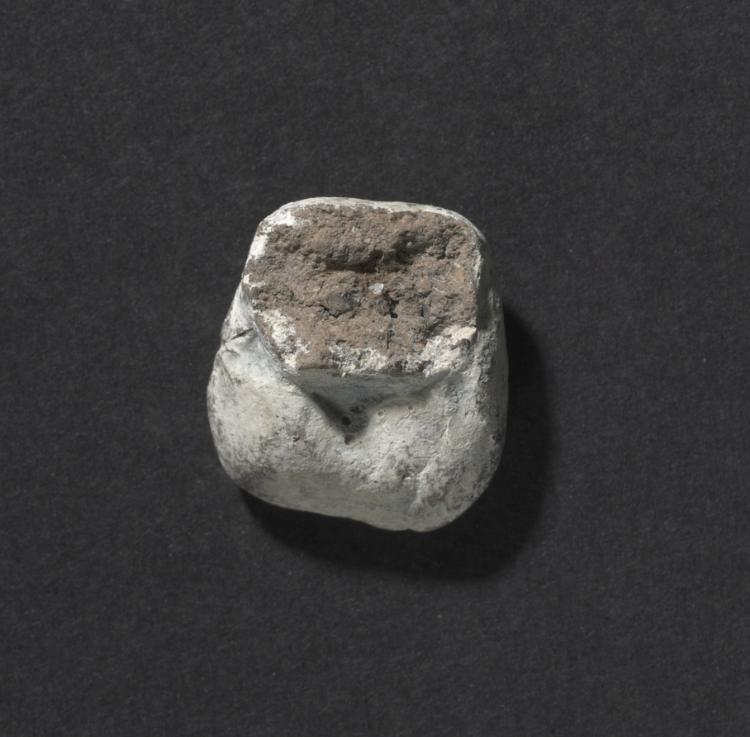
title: Shawabty of Ditamenpaankh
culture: Egypt, Late period (715–332 BCE), Dynasty 25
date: 715–656 BCE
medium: terracotta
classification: Funerary Equipment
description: High demand for shawabtys in the Late Period, a time when as many as 400 or more shawabtys were placed in the tomb with the deceased, gave rise to a specialized container for storing them: the shawabty box. This example is inscribed for the lady of the house, Ditamenpaankh, and was probably one of a pair originally made for her. The single-masted boat on the box's lid is perhaps an allusion to the pilgrimage of the deceased to the holy city of Abydos, the cult city of Osiris, king of the dead. The shawabtys inside are crude, mass-produced examples cast in an open mold. Made of terracotta, their blue paint imitates more costly shawabtys made of faience. As for the shawabty spell, it has been removed from its traditional location on the shawabty's front and relocated onto the sides of box, where it needed only to be written once, thus expediting production.